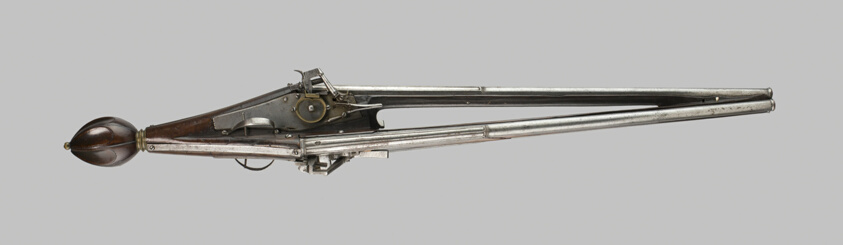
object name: Arms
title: Triple-Wheellock Pistol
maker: Franco-German (Alsatian); Strasbourg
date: 1610/20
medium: Steel, brass, and cherrywood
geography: Strasbourg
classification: firearm-handgun; arms; arms and armor